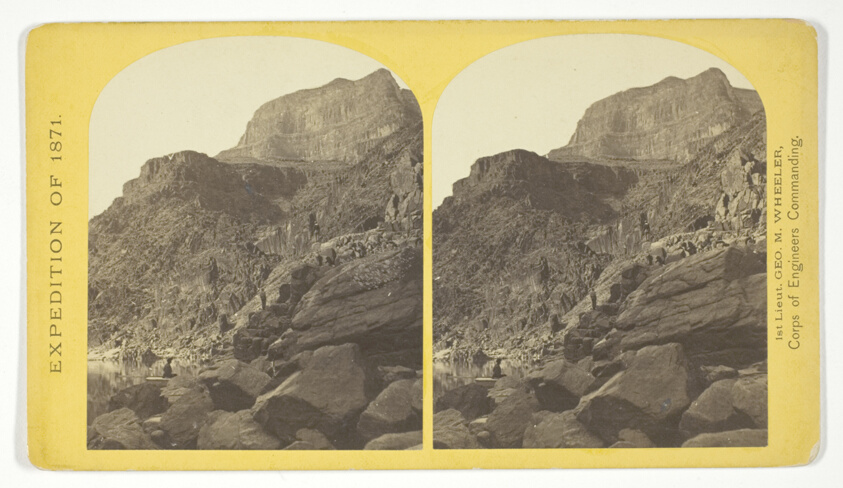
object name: Photograph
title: View of Grand Cañon walls, near mouth of Diamond River. From water line to first shelf 1.500 feet; from shelf to top of table 3.500 feet. Distance from point of view to top of walls 3 miles, No. 6 from the series "Geographical Explorations and Surveys West of the 100th Meridian"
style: 19th century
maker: Timothy O'Sullivan (American, born Ireland, 1840–1882); commissioned by George Wheeler for the War Department, Corps of Engineers, U.S. Army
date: 1871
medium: Albumen print, stereo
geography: United States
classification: stereograph (albumen); photography; photograph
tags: Collected by Hugh Edwards, Geographical Explorations and Surveys